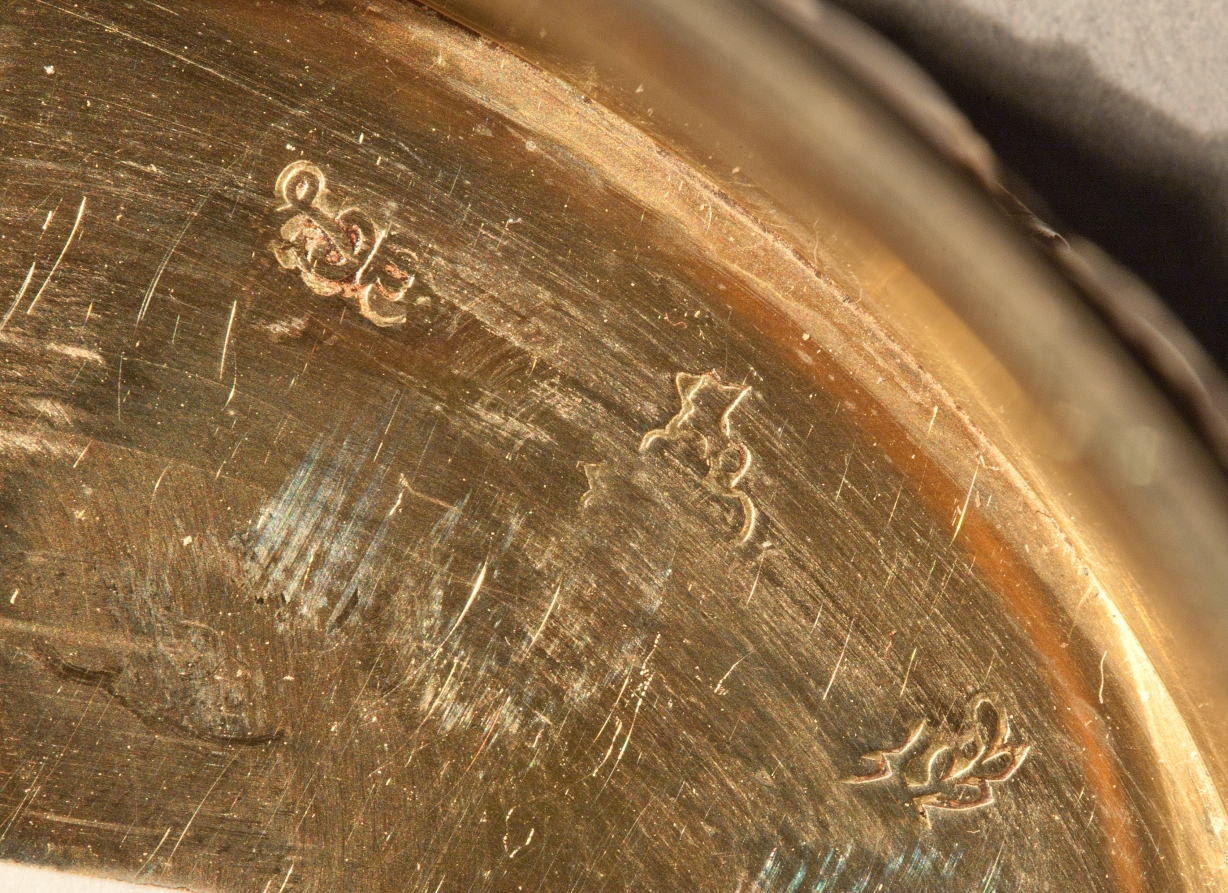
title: Snuff Box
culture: France, Paris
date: c. 1880–1900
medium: gold, enamel, agate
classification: Miscellaneous